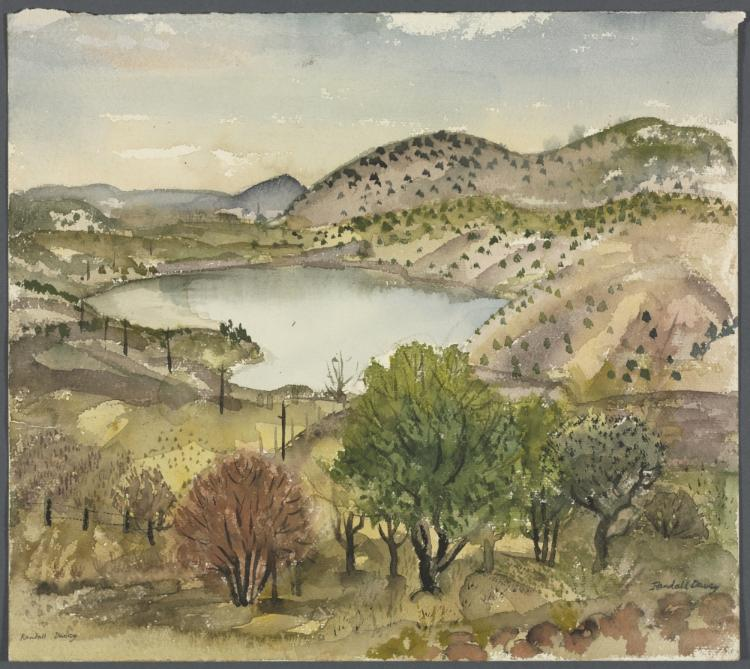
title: The Reservoir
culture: America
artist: Randall Davey (American, 1887–1964)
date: c. 1907–26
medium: watercolor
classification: Drawing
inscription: Signed by the artist, lower righthand corner